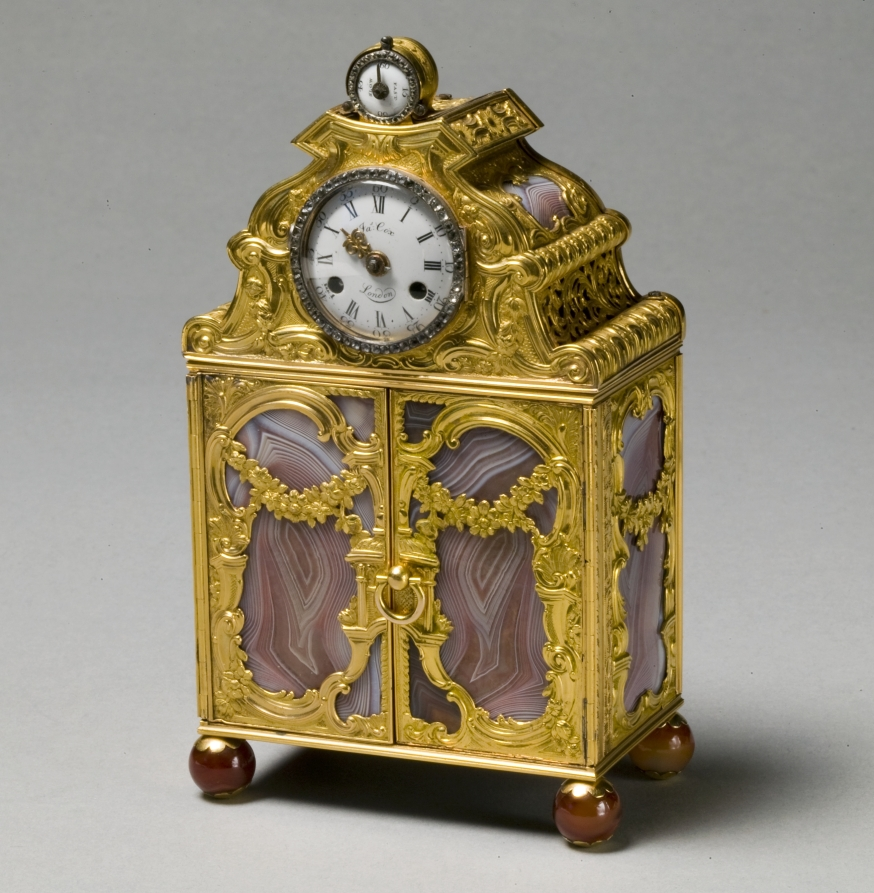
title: Cabinet Clock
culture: England, late 18th century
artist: attributed to James Cox (British)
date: c. 1770–75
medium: gold, agate, enamel dial, glass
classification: Miscellaneous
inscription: signed "Jas Cox"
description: In the 1700s and early 1800s, luxurious objects such as jewelry, miniatures, snuff boxes, and vanity cases emphasized their owner’s refinement and wealth. Especially popular were small cases with clocks and moving mechanical devices that played a handful of musical tunes. James Cox, the London goldsmith responsible for this clock and case, was known for creating such tuneful surprises, although this work no longer contains such a mechanism. Its glittering surface disguises a system based on the labor and suffering of enslaved people, whether in gold and stone mines or in shops where these goods were made by indentured apprentices. Many of these timepieces were designed for export and sold to the Chinese emperor Ch'ien Lung (1711–1799) and his court in attempt to balance out the substantial amount of tea that Britain was importing at the time.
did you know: The doors of this miniature cabinet open to reveal two small drawers that held the winding keys for the clock above.